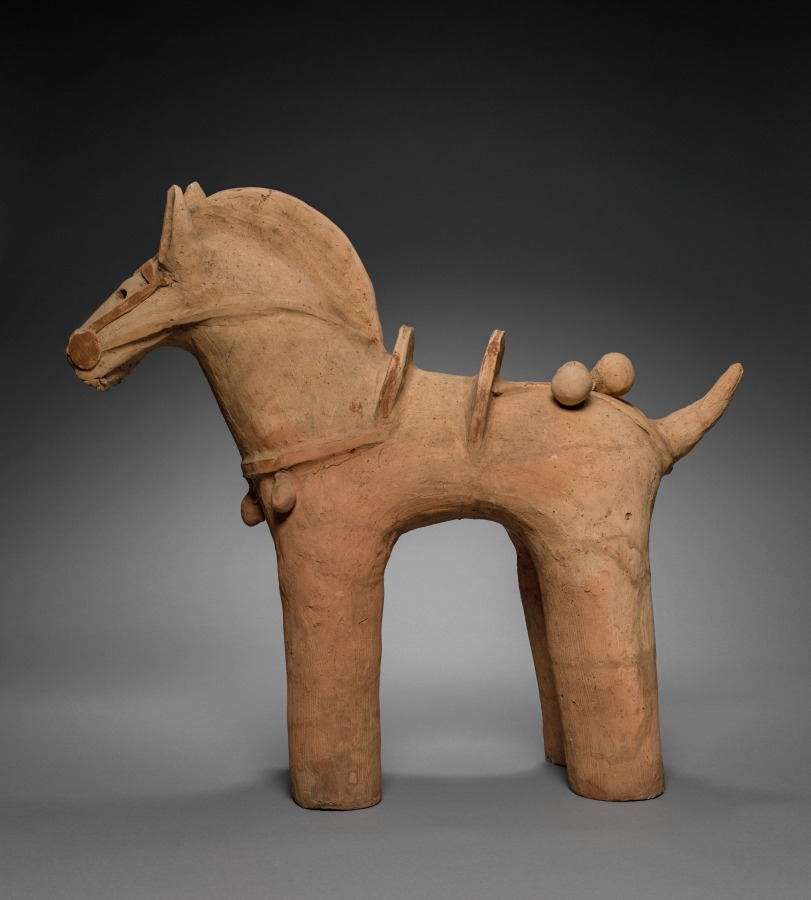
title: Haniwa Horse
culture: Japan, Kofun period (300–710 CE)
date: 400s–500s CE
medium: earthenware with traces of pigment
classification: Sculpture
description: This horse’s tack, with its round bells, resembles saddlery in fashion in Korea during the 400s–500s CE. Concurrent with mass migration from the Korean Peninsula, tombs covered with large earthen mounds similar to those on the Asian continent began to appear in Japan around the year 300 CE. Called “old mounds” (kofun), their surfaces were covered with hollow clay cylinders (haniwa). Sculptures of animals, buildings, and finally human figures followed, developing over the ensuing three centuries.